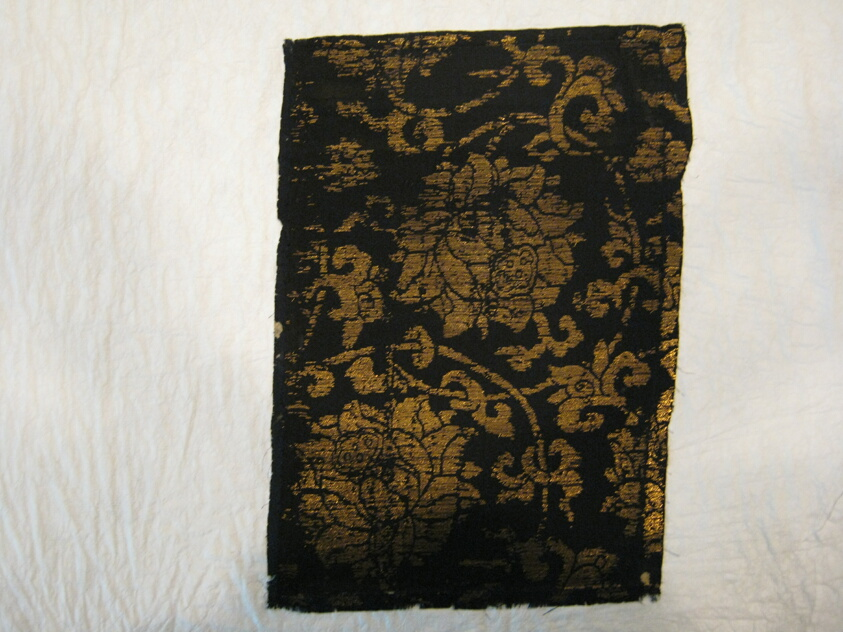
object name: Textile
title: Fragment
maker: Possibly China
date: 17th century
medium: Plain compound satin silk and gilt paper; 3 strips to m.m.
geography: China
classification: textile; weaving